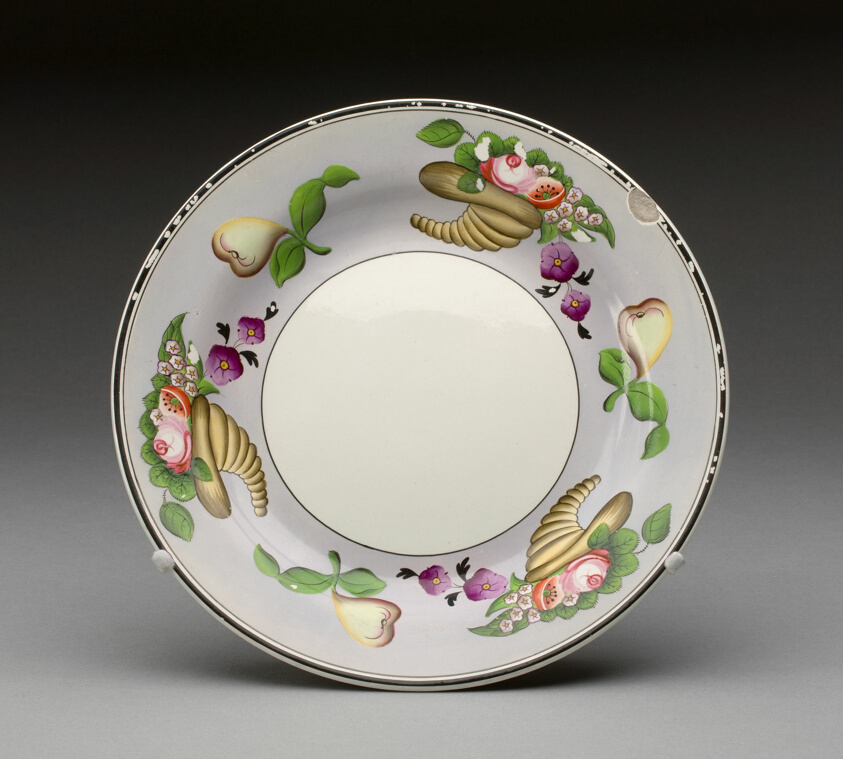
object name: Ceramics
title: Plate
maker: Wedgwood Manufactory (England, founded 1759)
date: c. 1840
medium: Porcelain with polychrome enamels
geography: Burslem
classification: plate (general, dish); dish (vessel); creamware (queensware); earthenware; european decorative arts; ceramics